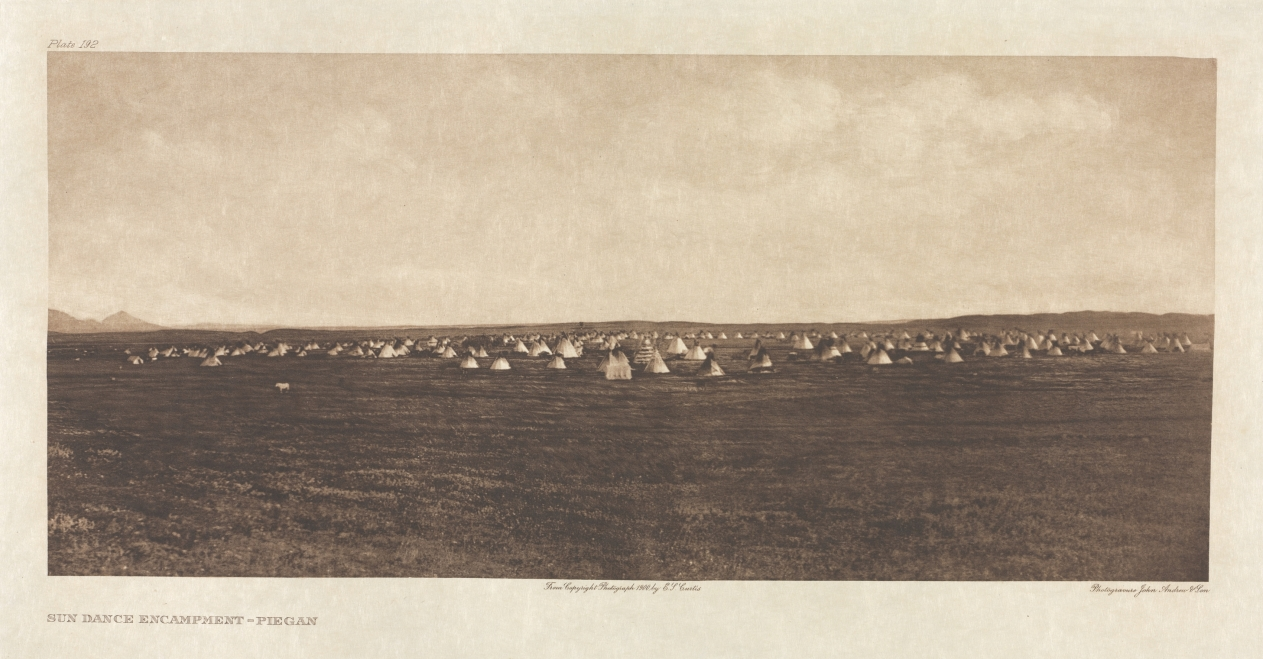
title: Portfolio VI, Plate 192: Sun Dance Encampment--Piegan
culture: America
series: The North American Indian: being a series of Portfolios picturing and describing the Indians of the United States, the Dominion of Canada, and Alaska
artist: Edward S. Curtis (American, 1868–1952)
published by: The University Press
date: 1900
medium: photogravure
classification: Portfolio